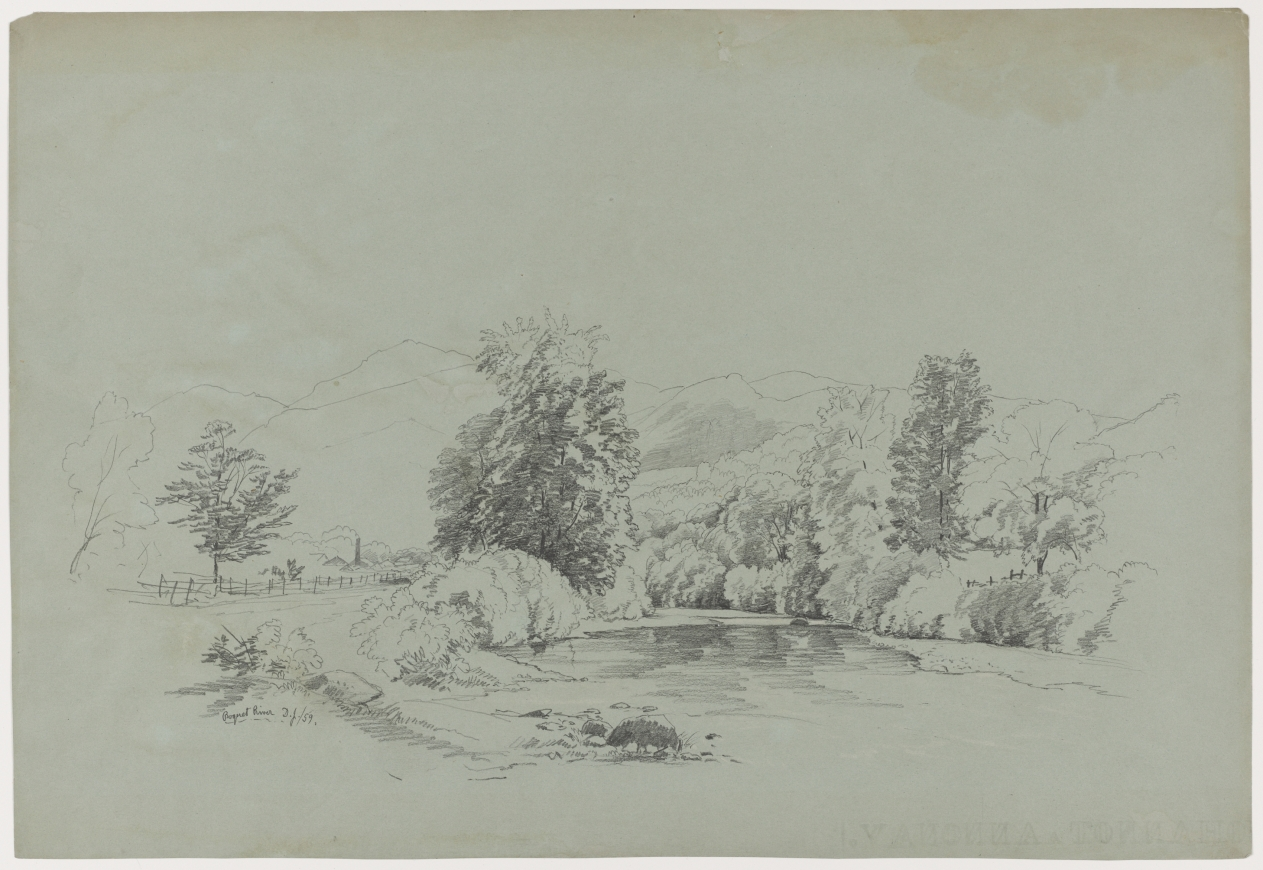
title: Boquet River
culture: America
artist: David Johnson (American, 1827–1908)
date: 1859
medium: Graphite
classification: Drawing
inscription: by artist, in graphite, ll: Bouquet River [underlined] D. J./59. ; verso, by unknown hand, in graphite, ul: 300 ; ur: 350. ; lr: 17022 / 22